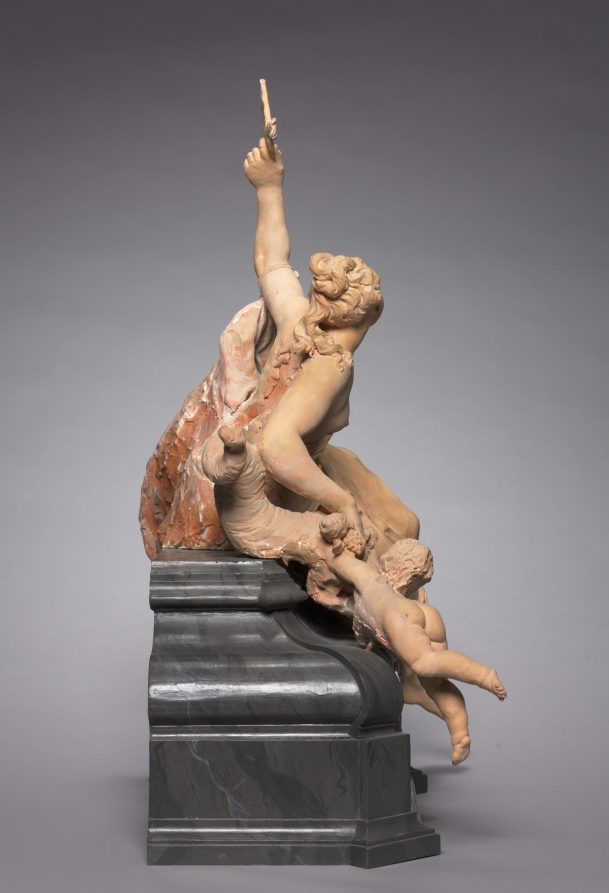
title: Abundance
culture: Austria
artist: attributed to Lorenzo Matielli (Austrian, c. 1688–1748)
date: c. 1730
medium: terracotta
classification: Sculpture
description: This work is probably a model for a garden statue that came from Castle Neuwartenburg near Vocklabruck. Castle Neuwartenburg was built from plans by Domenico Martinelli, with frescoes by Altomonte and sculpted decorations of the doorway and gardens by Lorenzo Matiellli (who also designed the door figures of the Cloisters at Melk and St. Michael's church in Vienna). The completion and dedication of the castle took place in 1732 with a personal visit by Emperor Karl VI. The statue was never executed, and the model remained in the castle.